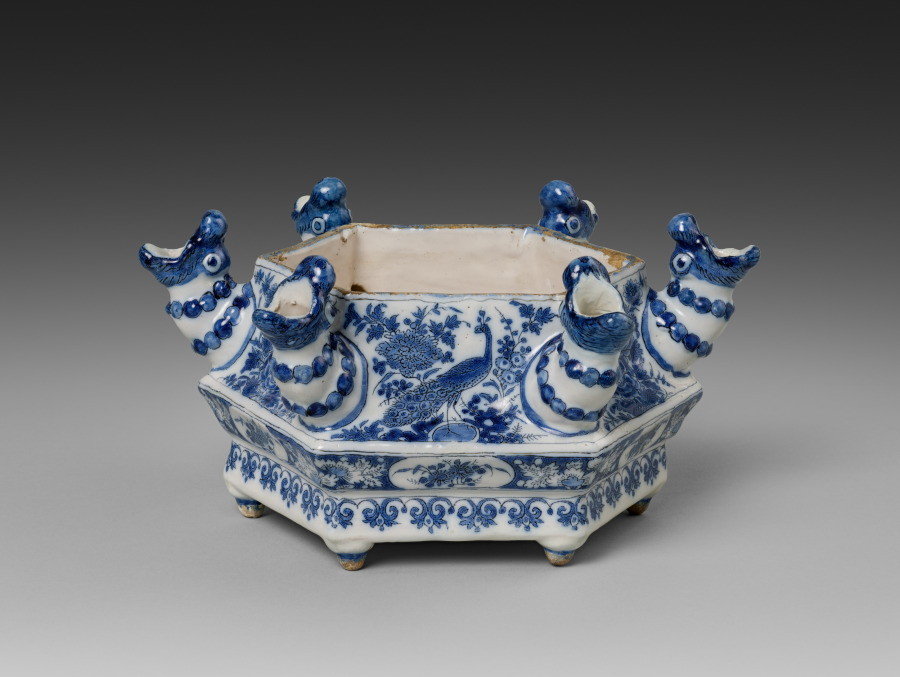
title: First Tier for a Flower Pyramid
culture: Netherlands, Holland, Delft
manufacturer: Adrianus Kocx (Dutch, active 1686–1701)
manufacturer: De Grieksche A (The Greek A) Factory (Netherlands, 1658–1811)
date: c. 1690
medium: Tin-glazed earthenware, painted in blue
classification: Ceramic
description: Allegorical figures representing Faith, Hope, and Love decorate the base of this pyramid, on which rest six tiers with spouts where flowers can be placed. Flower pyramids are among the most complex and luxurious types of ceramics produced in Delft in the late 1600s. This example was made in the Greek A Factory, owned by Adrianus Kocx. During his tenure, the factory became the most prestigious of Delft potteries and received commissions from Queen Mary II, who ruled over England, Scotland, and Ireland together with her husband, William III. She contributed to the international spread of the fashion for Delft ceramics.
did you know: The iconic blue-and-white ceramics from Delft originated as an attempt to copy Chinese porcelain.